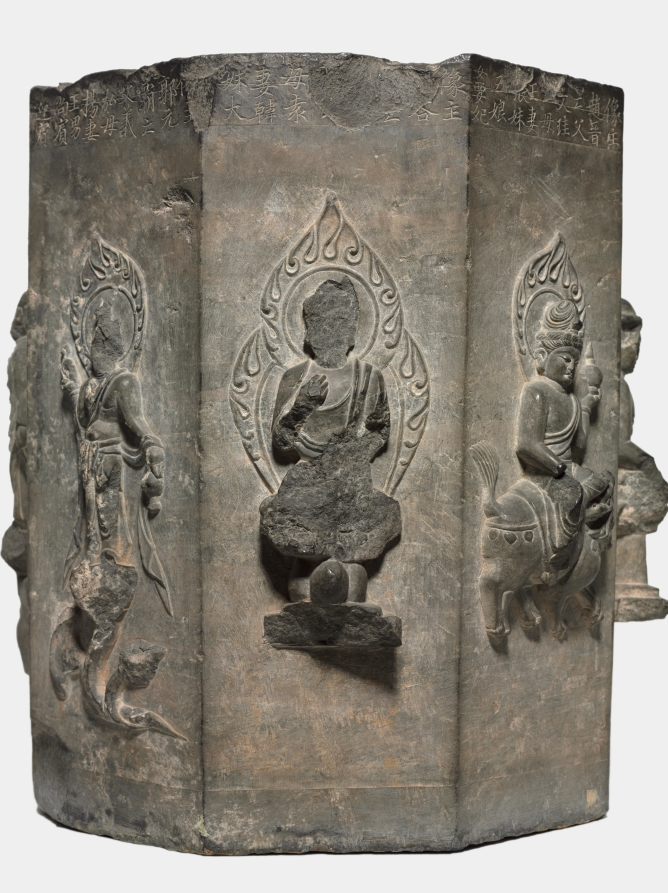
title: Section of a Dharani Pillar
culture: China, Tang dynasty (618-907)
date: 618–907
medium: limestone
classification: Sculpture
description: This octagonal stone pillar, with Buddhist figures carved on its eight sides, is part of a dharani pillar commissioned by Buddhist believers to pay tribute to the dead. The eight inscriptions seen here are eulogies dedicated by eight families to their deceased family members. Dharanis were a form of spell in Esoteric Buddhism said to possess supernatural power when being recited or carried and were incorporated into sutras, such as the Buddha Usnisa Vijaya Dharani Sutra. Dharani pillars, also called sutra pillars, became the dominant bearers of Usnisa Vijaya Dharani which supposedly helped sentient beings prolong life and destroy hardships of the eternal cycle of life and the realms of hell.